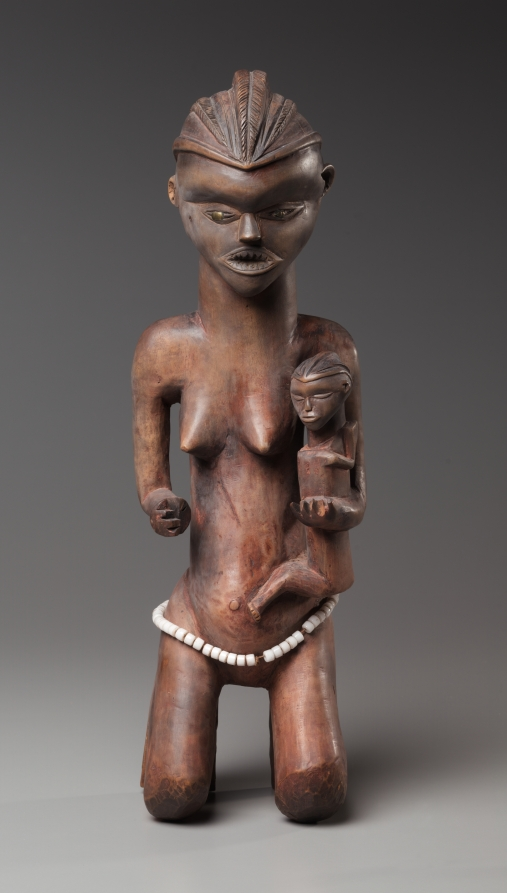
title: Mother-and-Child Figure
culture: Africa, Central Africa, Democratic Republic of Congo, Pende-style maker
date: late 1800s–early 1900s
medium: Wood, glass beads, upholstery studs, natural fiber, and pigment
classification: Sculpture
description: Wearing an elaborate lobed headdress and a beaded waistbelt, and having filed teeth and red-powdered skin, this maternity figure seems to have once carried an ax and a cup, wooden imitations of the two most important chiefly attributes. Perhaps together with a male counterpart, it was secretly kept inside the ritual house, serving as a guardian of the chief’s treasure. Its style places it in the westernmost corner of Pendeland, between the Lutshima and Kwilu rivers.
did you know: Eastern Pende carvers also once made larger mother-and-child sculptures to adorn the tops of chiefs' ritual houses.